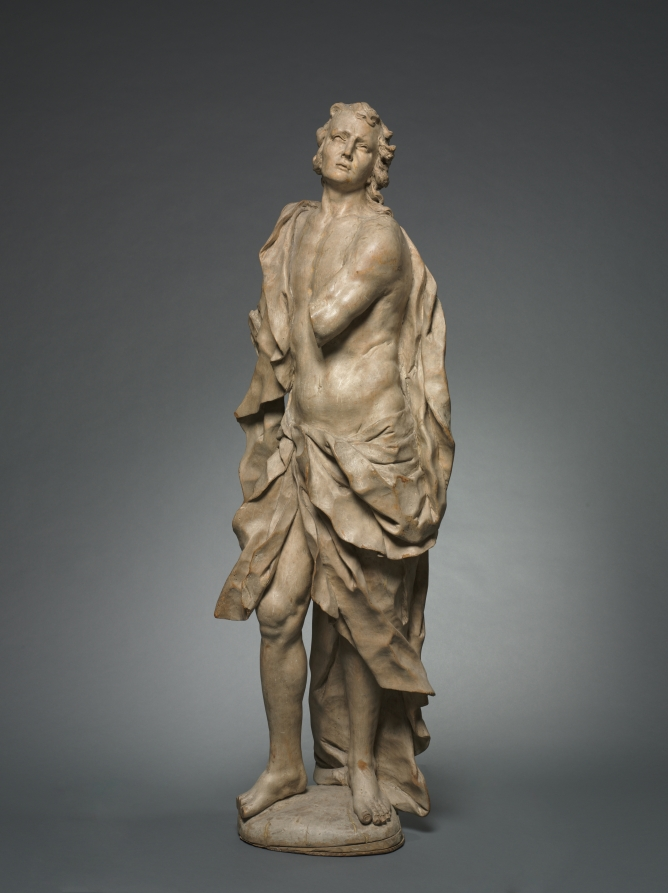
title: A Saint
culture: Germany or Austria, 18th century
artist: follower of Diego Francesco Carlone (Italian, 1674–1750)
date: c. 1730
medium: wood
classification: Sculpture